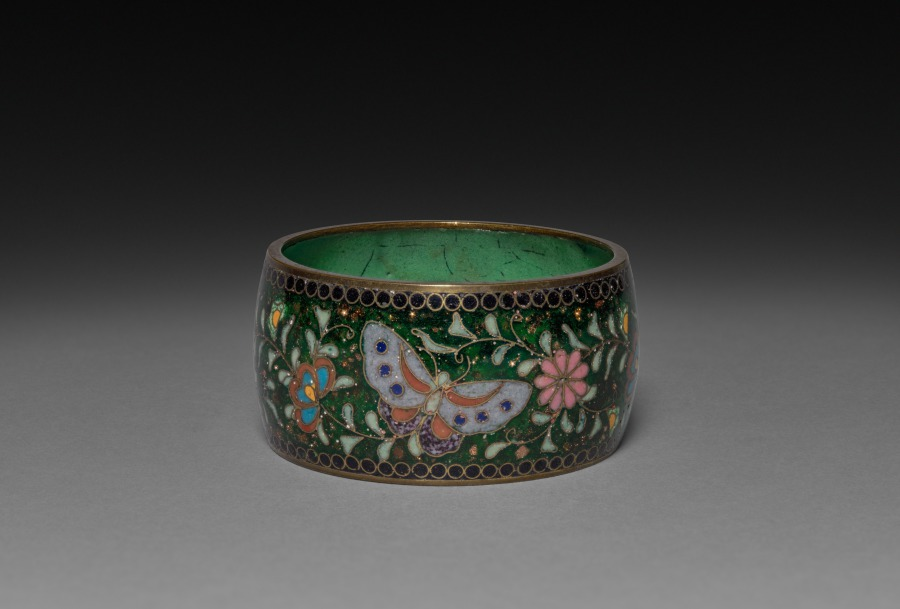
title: Napkin Ring with Butterflies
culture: Japan, Meiji period (1868–1912) or Taishō period (1912–26)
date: early 1900s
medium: cloisonne enamel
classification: Enamel